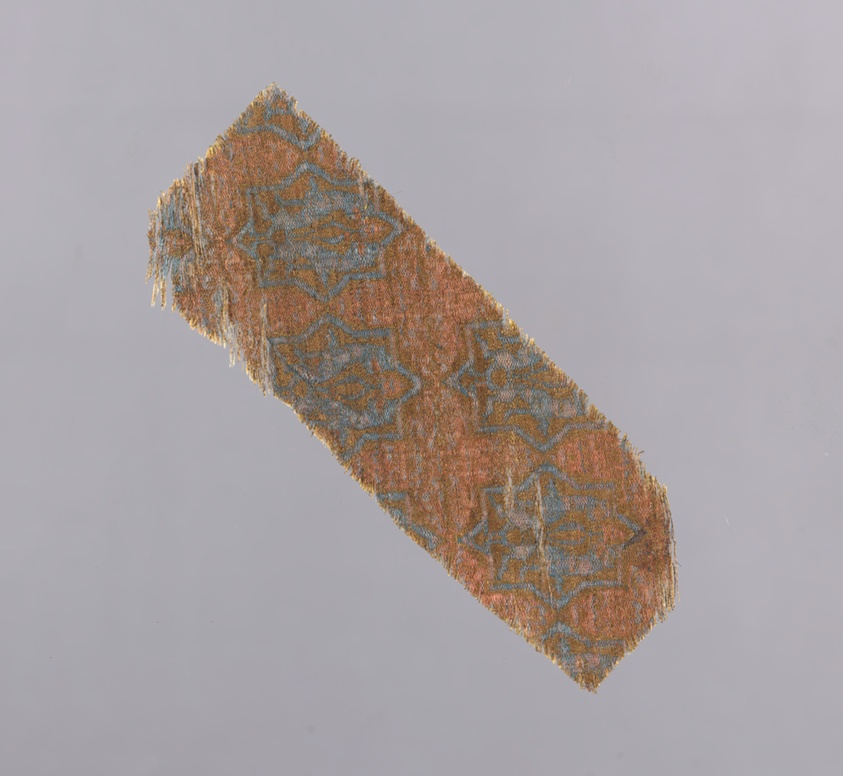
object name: Textile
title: Fragment From the Chasuble of San Valero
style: moorish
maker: Spain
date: 13th century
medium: Silk and gilt-animal-substrate-wrapped silk, weft-faced three-color complementary weft plain weave with inner warps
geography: Spain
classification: textile; weaving; liturgical